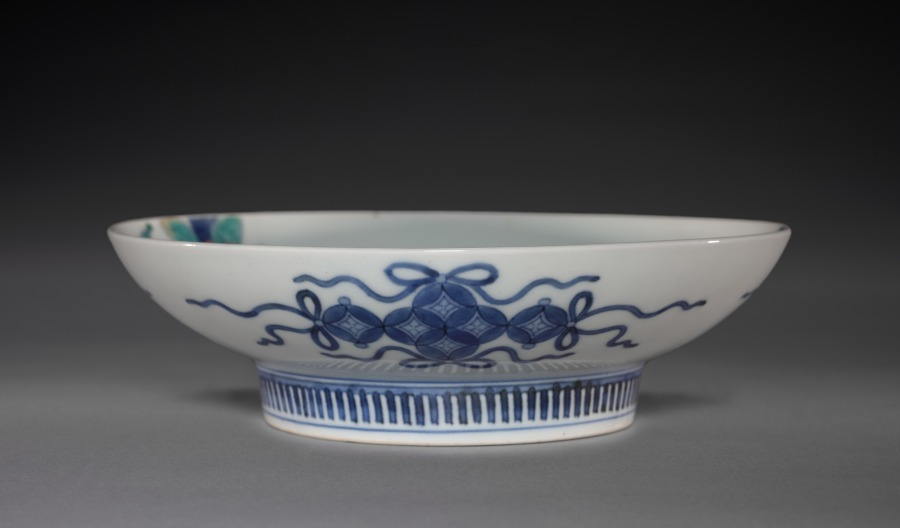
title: Dish with Camellia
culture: Japan, Edo period (1615–1868)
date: c. 1688–1716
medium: Porcelain with underglaze blue and overglaze color enamel (Hizen ware, Nabeshima type)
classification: Ceramic